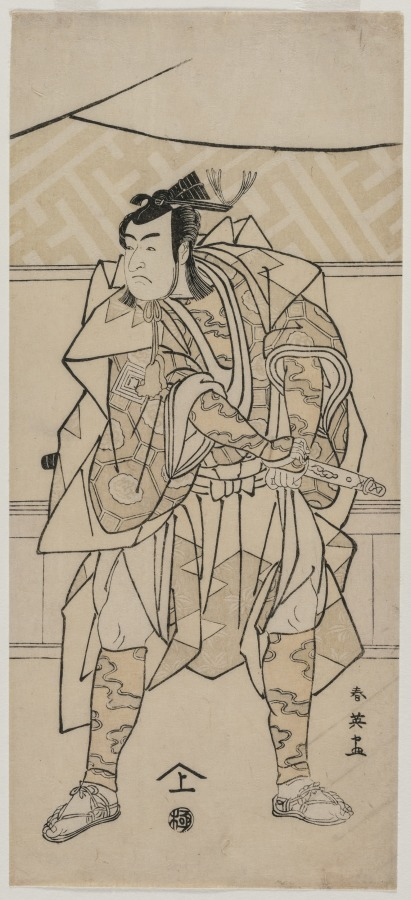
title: Ichikawa Monnosuke II as a Samurai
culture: Japan, Edo period (1615–1868)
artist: Katsukawa Shunei (Japanese, 1762–1819)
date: 1791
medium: color woodblock print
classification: Print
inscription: Signature: Shunei ga Censorship Seal: kiwame